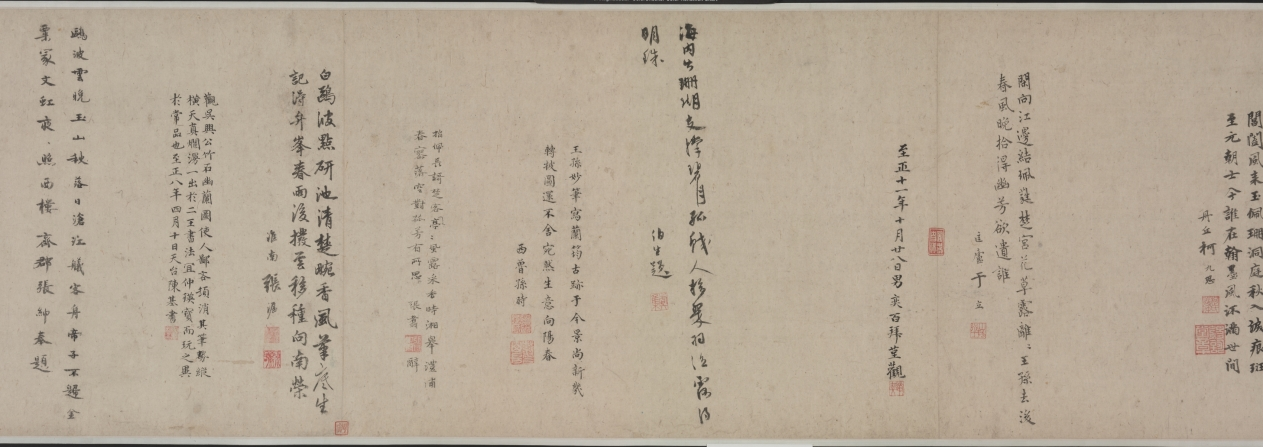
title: Bamboo, Rocks and Lonely Orchids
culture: China, Yuan dynasty (1271-1368)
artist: Zhao Mengfu (Chinese, 1254–1322)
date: 1271–1368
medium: Handscroll; ink on paper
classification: Painting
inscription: 竹石幽蘭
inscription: 孟頫為善夫寫. [印] 趙氏子昂; [印] 松雪齋; [印] 天水郡圖書印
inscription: 古人善書者必能畫點墨作蠅，便自有生意。松雪翁蘭石草聖飛帛筆法皆具，可寶也。安陽韓性 [印]明善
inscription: Colophon 2. Qiu Yuan 仇遠 (1247-after 1328), a respected poet during the Song and Yuan periods. He was linked to, among others, Zhao Mengfu and Gao Kegong. Zhao Mengfu painted a version of Nine Songs 九歌圖 for him, and Gao Kegong dedicated to him a painting titled Mountain Village 山村圖 (current whereabouts unknown). His poem here is also preserved in his collected works.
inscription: Colophon 3. Zheng Yuanyou 鄭元祐 (1292-1364), an erudite scholar and teacher of renown, active in Hangzhou and Suzhou. In the 1350s, when Gu Ying’s literary gatherings were at their peak, he was already elderly and participated in a limited way.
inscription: Colophon 4. Wu Kegong 吳克恭 (active mid-1300s), a friend of Gu Ying and Ni Zan 倪瓚 (1301–1374), a major Yuan painter.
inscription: Colophon 5. Angji 昻吉 (jinshi of 1348), of Western Xia 西夏 origin and a poet of distinction. He wrote an introduction to the painting Literary Gathering at Yushan 玉山雅集圖, of which Zhang Wo was the painter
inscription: Sheet 2. Yuan: friends of Gu Ying Colophon 6. Wang Zifang 王孜方 (active mid-1300s), an official who, at the time of his visits to Gu Ying’s estate, had reached the rank of Minister. He is better known under the name Wang Keju 王可矩.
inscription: Colophon 7. Ke Jiusi 柯九思 (1290–1343), a major official who served in the Kuizhang Pavilion 奎章閣 and as an advisor to Emperor Wenzong in matters of calligraphy and painting.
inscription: Colophon 8. Yu Li 于立 (active mid-1300s), a Daoist recluse, poet, and close friend of Gu Ying, so much so that during his visit to Gu Ying’s estate he was given accommodation in a special pavilion. His poem here is also preserved in Gu Ying’s Cao tang ya ji.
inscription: 至正十一年十月廿八日男奕百拜堇觀 [印] 趙奕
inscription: Colophon 10. Yu Ji 虞集 (1272-1398), a major official and literary figure who also served in the Kuizhang Ge. His poem is recorded in his collected works. The poem is one of a set of four inscribed at the request of Wang Huayu 汪華玉 on Orchids and Rock 蘭石圖 by Zhao Mengfu, obviously a different, long lost, painting. Wang Huayu was an official and a collector (jinshi of 1327). Yu Ji’s colophon here was written before 1348 and during his retirement in Linchuan 臨川, Jiangxi, possibly sent from there. It is possible he had not seen the painting, and his calligraphy here appears to be rather casual and detached, jotting down an old poem without much care, contrary to his earlier practice.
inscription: Colophon 11. Sun Shi 孫時 (mid-1300s–early 1400s), a native of Yuncheng 鄆城, Shandong, and a jinshi of 1390. He may have been quite young when paying a visit to the Yushan gatherings in the late 1340s and early 1350s.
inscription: Colophon 12. Zhang Zhu 張翥 (1287–1368), Qiu Yuan’s disciple and a poet of renown, who enjoyed a belated career in officialdom and was known for his integrity.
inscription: Sheet 4. Yuan and Ming: further friends of Gu Ying; colophon 17 begins the early Ming sequence. Colophon 13. Zhang Wo 張渥 (active c. 1336-after 1364), a frustrated scholar, a poet, and a painter of landscape and figures. An active participant in Gu Ying’s literary circle, he painted the Literary Gathering at Yushan, a pictorial document of the individuals and activities on Gu Ying’s estate. His rendering of Nine Songs is well known, and one version is in the collection of the Cleveland Museum of Art (see 1959.138). His poem here is also found in Gu Ying’s Cao tang ya ji, under the entry “ti Zhao Hanlin mo lan 題趙翰林墨蘭” (inscribed on the Ink Orchid by Zhao the Hanlin academician). This is a rare instance of calligraphy as well as signature by the artist.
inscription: 觀吳興公竹石幽蘭圖使人鄙吝頓消。其筆勢從橫天真爛澷，一出於二王書法。冝仲瑛寳而玩之異於常品也。至正八年十月天台陳基書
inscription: Colophon 15. Zhang Shen 張紳 (active about 1340–after 1385), a respected calligrapher and participant in Gu Ying’s literary gathering. He resided in Kunshan, the same city where Gu Ying’s estate lies. In the third line of the poem, he mentioned Gu Ying’s hao, “Jinsu 金粟.” This was a name he assumed later in life, after the death of his mother in the year 1356. Thus this inscription must have been written after that date.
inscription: Colophon 16. Wang Sun 汪遜 (active mid-14th century), a little-known native of Kuaiji 會稽, who may have been one of the infrequent visitors to Gu Ying’s estate.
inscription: Colophon 17. Hu Guang 胡廣 (1370-1418) is the first Ming colophon writer on this scroll. He was an official of great power in the court and a trusted advisor of Emperor Chengzu; he served as the Grand Academician of the Hall of Literary Profundity 文淵閣大學士 and Grand Academician of the Left Secretariat of the Heir-Apparent 左春坊大學士.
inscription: Sheet 5. Early Ming Colophon 18. Wang Yinshi 王尹實 (active about 1403–about 1424), a native of Siming 四明, Zhejiang, and a minor official and calligrapher.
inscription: Colophon 19. Zhang Yuchu (signed here as “Wuwei 無 為”), the forty-third Heavenly Master of the Zhengyi sect of Daoism. A man of erudition, he was also a poet, painter, and calligrapher. A modified version of the poem here was published in his collected works titled Xian quan ji 峴泉集. A slight modification in the first line is the only change: “Wu xing miao yao nian bing xue zi 吳興玅年氷雪姿.”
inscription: Colophon 20. Yao Guangxiao 姚廣孝 (1335-1418), a Buddhist monk, scholar, and counselor to Chengzu in his successful attempt at usurpation of the throne. Yao Guangxiao was a controversial figure but wielded enormous power.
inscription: Sheet 6. Wang Ning alone Colophon 21. Wang Ning 王寧 (d. 1411) signed as “Qingzhen 清真” in this colophon. One of the three seals reveals his identity as the Yongchun Hou 永春侯 [Marquis of Lasting Spring] (appointed 1402), and the husband of Princess Huaiqing 懷慶公主 (1328-1398), the sixth daughter of the founder of the Ming dynasty, Zhu Yuanzhang. This colophon postdates 1402.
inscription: Sheet 7. Mid-Ming Colophon 22. Ou Yi’an 區易安 (active first half of 15th century), unknown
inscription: Colophon 23. Chen Lian 陳璉 (1370-1454), a native of Dongguan 東莞, Guangdong 廣東, and an official admired for his erudition and perspicacity. In view to the known calligraphic style of Chen Lian, this colophon appears to be a transcription and not written by him.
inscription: Colophon 24. Wei Ji 魏驥 (1374-1471) enjoyed longevity (he lived to the age of ninety-eight) and an extended length of service as an official. A jinshi of 1406, he eventually became the Minister of Personnel in Nanjing 南京吏部尚書. The colophon here is dated 1434, when he was invited to view the painting by the Court Musician Mo Zhizhong 莫至翀, its owner. Again, in view of its calligraphic style, this was not written by him, but is a transcription from the original.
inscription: Colophon 25: Zhang Yi 章鎰 (active 1462-1473), a Ningbo native and an official with a reputation for courage and integrity.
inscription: Sheet 8. Further mid-Ming Colophon 26. Yin Zhi 尹直 (1427-1511), a controversial figure in Ming politics in spite of his erudition and high position as the Minister of War 兵部尚書.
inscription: Colophon 27. Zou Yu 鄒虞 (active 1460-1520; jinshi of 1490), a native of Hangzhou. In 1510, he was appointed Administrative Vice Commissioner in Guangdong.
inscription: Sheet 9. Xu Shouhe 徐守和 alone Colophon 28. Xu Shouhe 徐守和 dated his entry in 1629. Since he wrote it in his own studio, The Lesser Qingbi Pavilion 小清閟, he was likely the owner of the scroll. Xu’s life is not well documented; he was a connoisseur of note during the last years of the Ming dynasty rule. He may have acquired the Cleveland scroll from Wu Ting, whose seals appear here.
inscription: Sheet 10. The mounter’s note. Xu Shudong 徐曙東 of Jiaxing 嘉興 made the remounting on the first day of sixth month, 1802.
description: Bamboo and orchids are motifs associated with the virtues of the scholar-official. Bamboo that bends but does not break stands for moral integrity, endurance, and loyalty. Wild, fragrant orchids that bloom in the shadow symbolize modesty and the aura of learnedness. Rocks are often considered to be miniature versions of mountains that form the universe. This monochrome ink painting is brushed on paper in a masterfully calligraphic manner. While the rocks are delineated in chalky, dry strokes showing the effect of flying white (feibai), the bamboo and orchids are drawn with a swift brush demonstrating the virtuosity of the artist.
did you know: One of the many inscriptions records that the handscroll was last remounted by Xu Shudong 徐曙東 of Jiaxing 嘉興 in 1802.